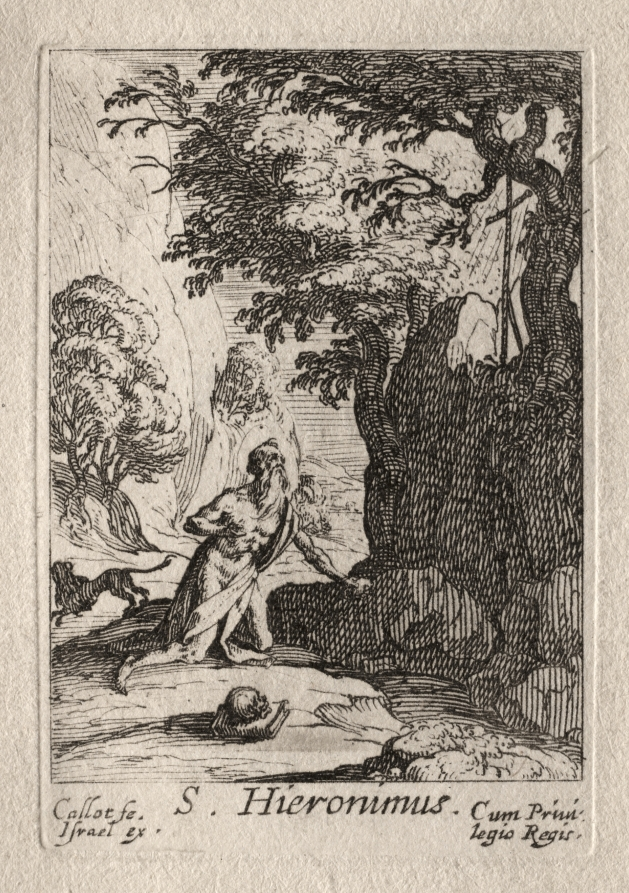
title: Les Penitents: St. Jérome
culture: France, 17th century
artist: Jacques Callot (French, 1592–1635)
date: ca. 1632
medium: etching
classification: Print